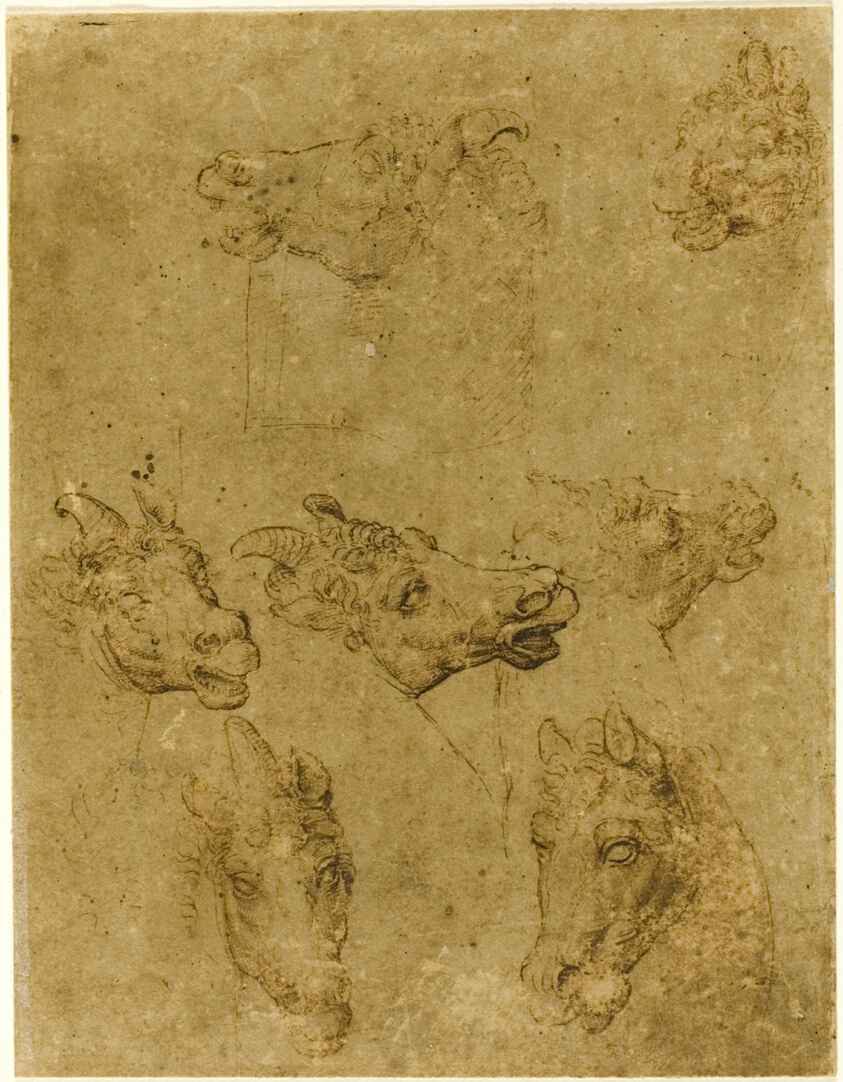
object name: Drawing and Watercolor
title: Heads of Horses and Unicorns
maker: Follower of Leonardo da Vinci (Italian, 1452-1519)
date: 1530/40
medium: Pen and brown ink on tan laid paper, laid down on cream laid paper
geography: Italy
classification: pen and ink drawings; drawings (visual works); prints and drawing